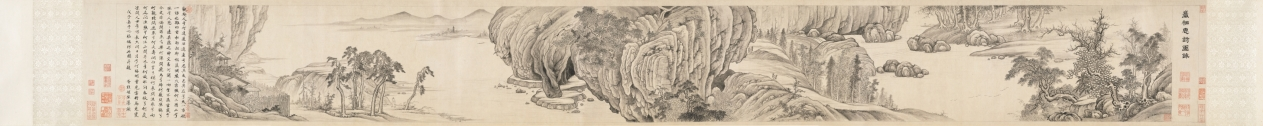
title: Meditative Visit to a Mountain Retreat: In Picture and in Words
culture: China, Ming dynasty (1368–1644)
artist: Xiang Shengmo (Chinese, 1597–1658)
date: 1648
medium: handscroll; ink on paper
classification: Painting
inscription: Artist's title and 3 seals (in front of painting): [title] Meditative Visit to a Mountain Retreat: In Picture and in Words 巖栖思訪圖詠 [3 seals] Tian lai ge zhong wen sun 天籟閣中文孫; Xiang shi kong zhang zui xin han mo 項氏孔彰醉心翰墨; Qing fu yuan zhong di yi miao ye 清福緣中第一妙業.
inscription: [印] 兔烏叟; 考古正今. 觀斯人兮何逍遙，非逍遙兮思其友。 思其友兮天一方，欲一訪之難回首。 松耶柏耶稱後凋，巖穴霏微何二酉。 山兮水兮人悠悠，遠莫致之神交否？ 河關一向望不及，言笑于今更非偶。 問游魚兮樂何深？問飛鳥兮歸何藪？ 問猿鶴兮何親疎？問鹿豕兮何夭壽？ 問白雲兮從何來？問流泉兮向何走？ 問漁樵兮何江山？問草木兮何畝畎？ 問春秋兮何炎涼？問世人兮何長久？ 問日月兮何晦明？曾見當時烏兔叟？ 戊子嘉平之初偶作此圖并題。 胥樵項聖謩識。 [印] 兔烏叟; 項氏孔彰; 未喪斯文.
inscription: 13 additional seals: 4 of Tang Zuomei 唐作梅 (late 18th–19th century); 3 of Zhang Baixi 張百熙 (1847–1907); 4 of Zhang Heng 張珩 (1915–1963); 2 unidentified.